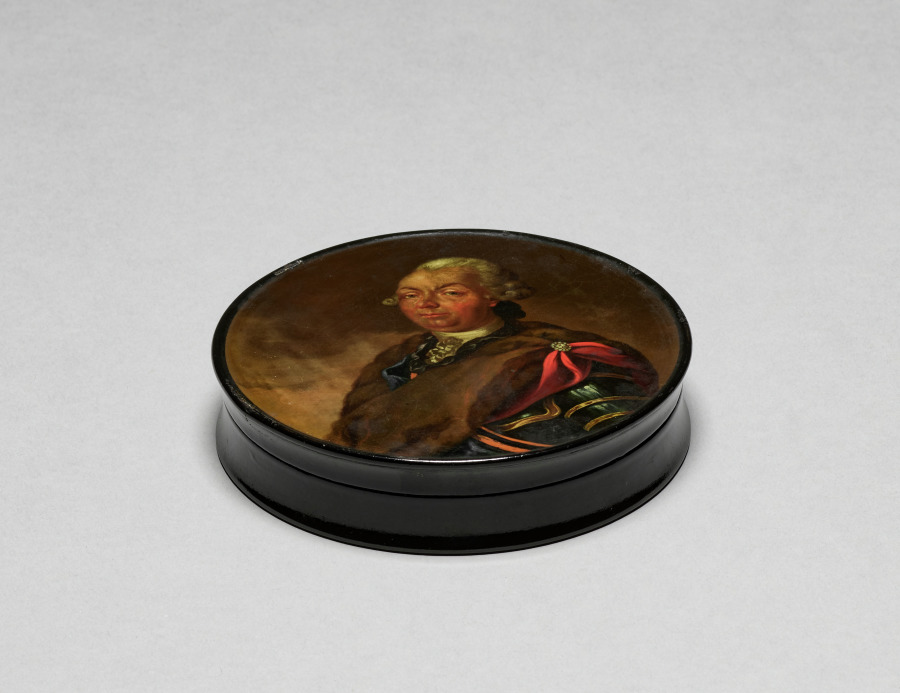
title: Box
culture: Germany, late 18th Century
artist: possibly studio or workshop of Johann Heinrich Stobwasser (German, 1740–1829)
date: late 1700s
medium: lacquered wood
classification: Miscellaneous